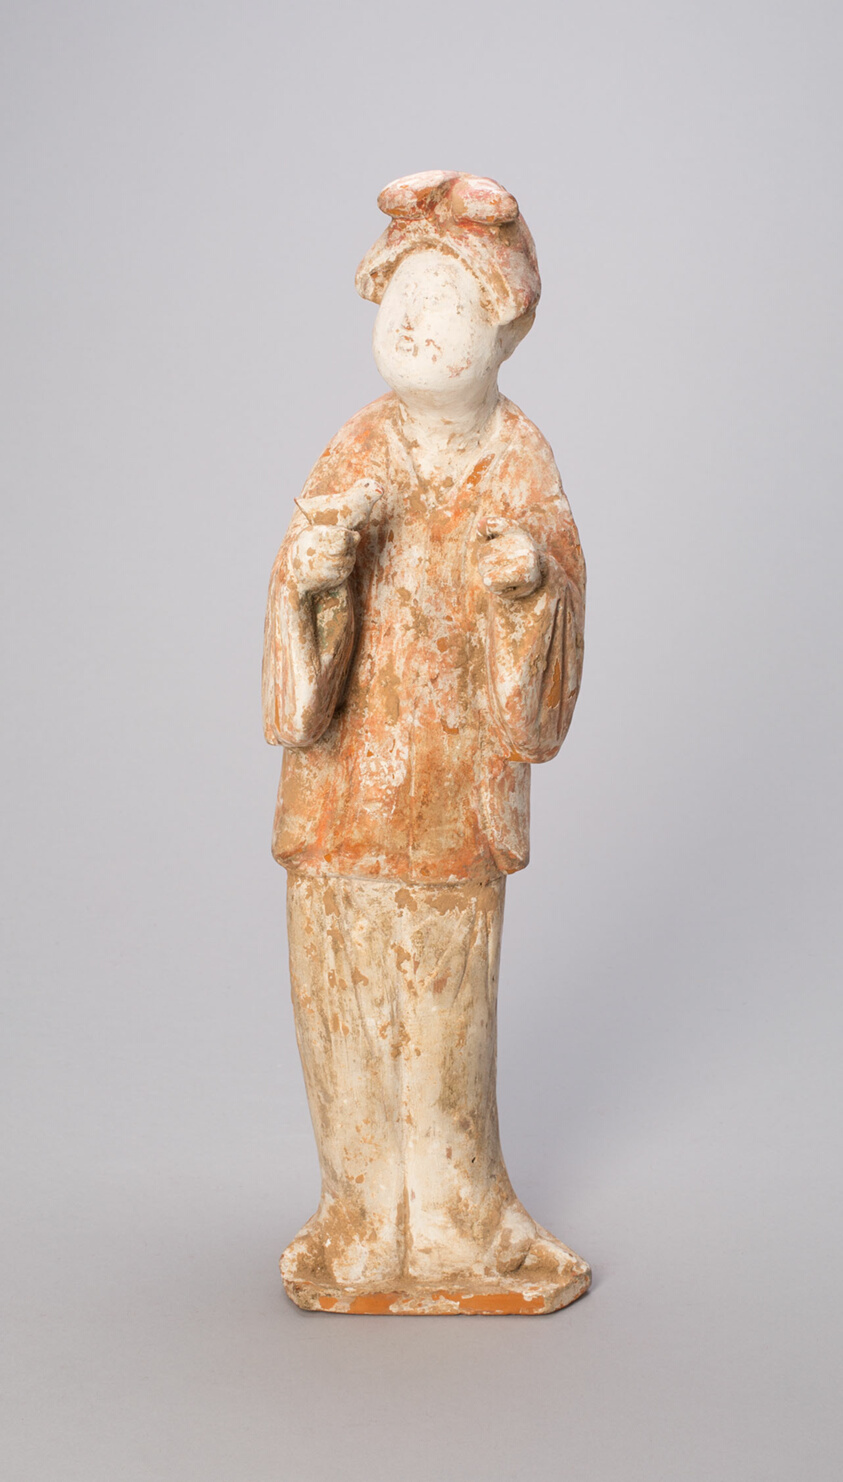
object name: Sculpture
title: Woman Holding a Bird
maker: China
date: Tang dynasty (618–907)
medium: Earthenware with traces of pigment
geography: China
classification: ceramics; asian art; sculpture